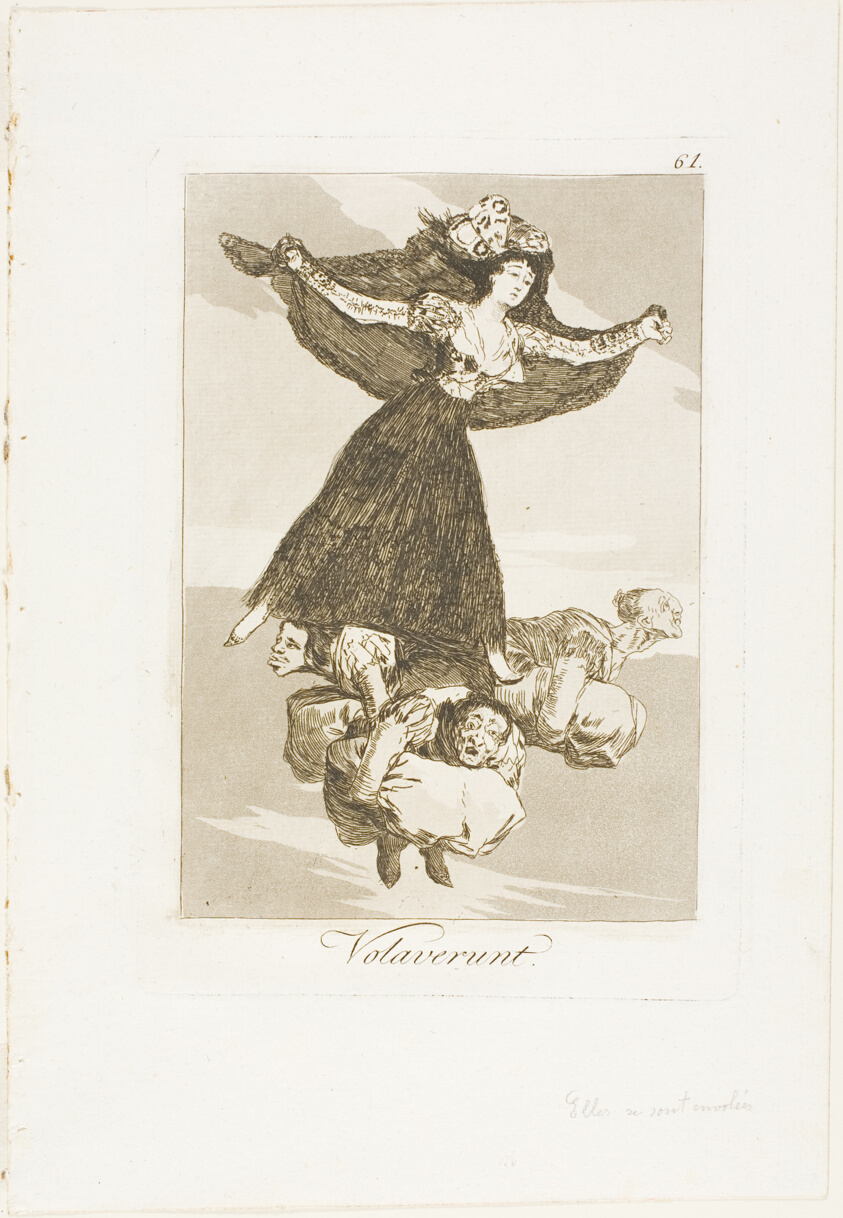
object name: Print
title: They Have Flown, plate 61 from Los Caprichos (Caprices)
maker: Francisco José de Goya y Lucientes (Spanish, 1746-1828)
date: 1797–98, published 1799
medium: Etching, aquatint, and drypoint in brown on ivory laid paper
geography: Spain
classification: etching; print; prints and drawing